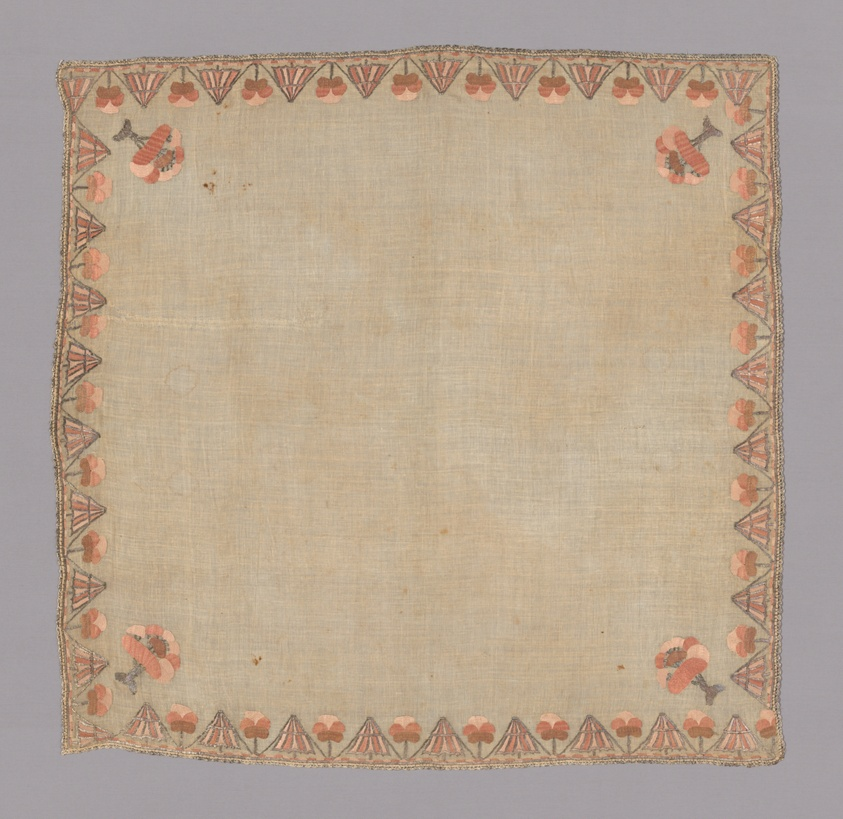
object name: Textile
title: Cover or Handkerchief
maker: Turkey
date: 1800/1850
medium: Embroidered in design of trees and tents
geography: Turkey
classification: textile; needlework (visual works); weaving